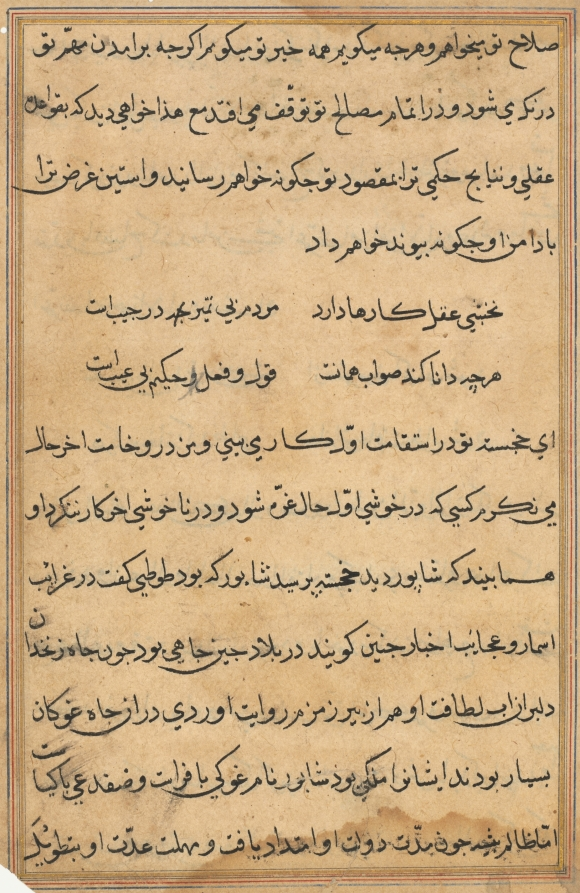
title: Page from Tales of a Parrot (Tuti-nama): text page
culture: Mughal India, court of Akbar (reigned 1556–1605)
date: c. 1560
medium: gum tempera, ink, and gold on paper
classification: Painting